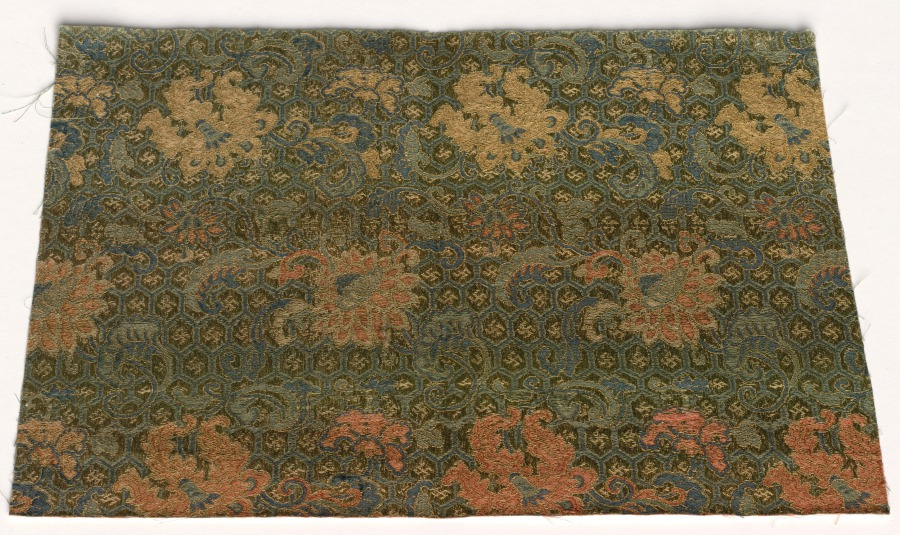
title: Fragment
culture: China, 19th century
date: 1800s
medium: silk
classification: Textile